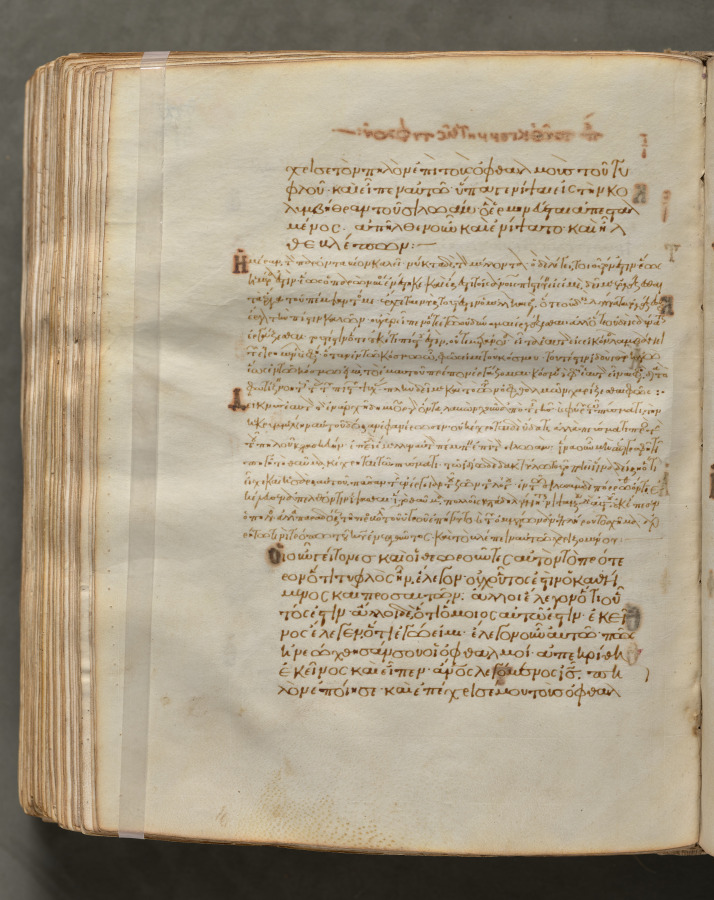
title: Text, folio 368 (verso), from a Gospel Book with Commentaries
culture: Byzantium, Constantinople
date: c. 1000–1100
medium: ink, tempera, and gold on vellum; leather binding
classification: Bound Volume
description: Each of the four gospels in this book opens on a page with brilliantly illuminated borders depicting the author of the text as well as birds—principally peacocks, symbols of the immortality of the soul—and fountains, representing the fountain of life and the salvation of the soul. This volume consists of 428 leaves with texts in Greek. Its level of sophistication suggests that it was probably written and decorated in a monastery in Constantinople.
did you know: Gospel books were carried in procession through Byzantine churches.